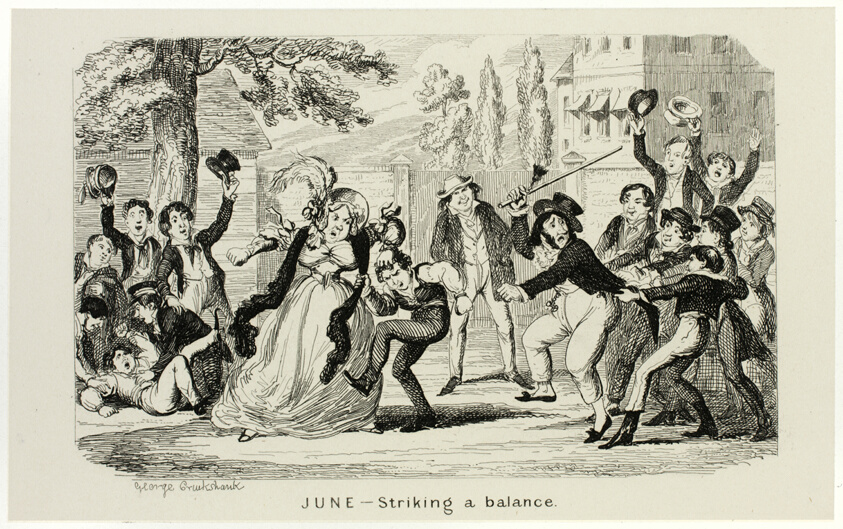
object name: Print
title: June - Striking a Balance from George Cruikshank's Steel Etchings to The Comic Almanacks: 1835-1853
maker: George Cruikshank (English, 1792-1878); published by Pickering & Chatto (English, 19th century)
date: 1840, printed c. 1880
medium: Steel etching in black on cream India paper, laid down on off-white card (chine collé)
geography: England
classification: etching; paper; steel; print; prints and drawing